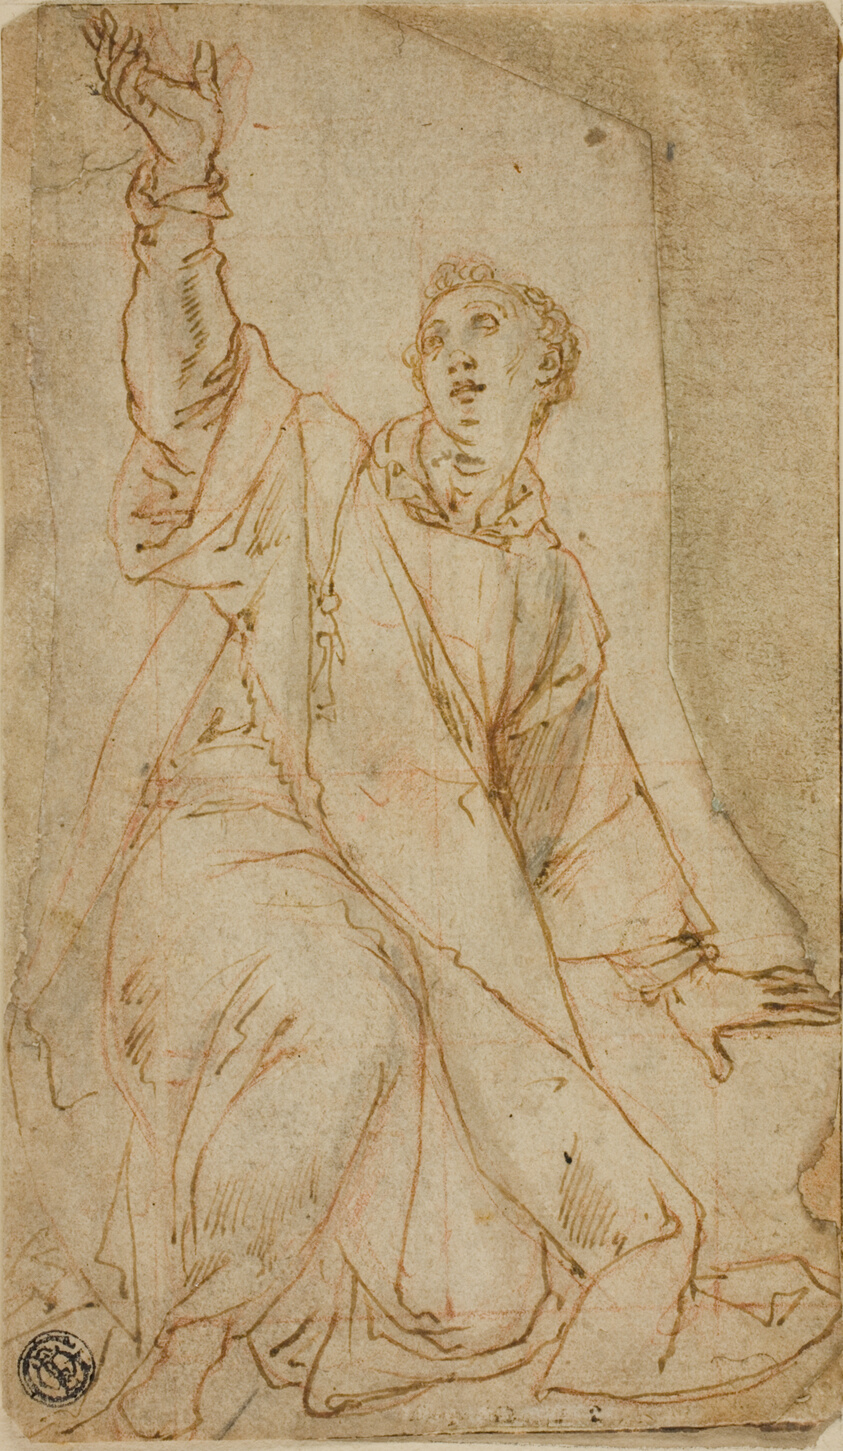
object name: Drawing and Watercolor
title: Kneeling Saint Stephen with Upraised Right Arm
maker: Attributed to Sabatini, called Lorenzino da Bologna; Italian, c. 1530-1576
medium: Pen and brown ink over black and red chalk, on tan laid paper, squared in red chalk, pieced and laid down on cream laid paper, tipped onto ivory wove paper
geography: Italy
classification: chalk; drawings (visual works); prints and drawing